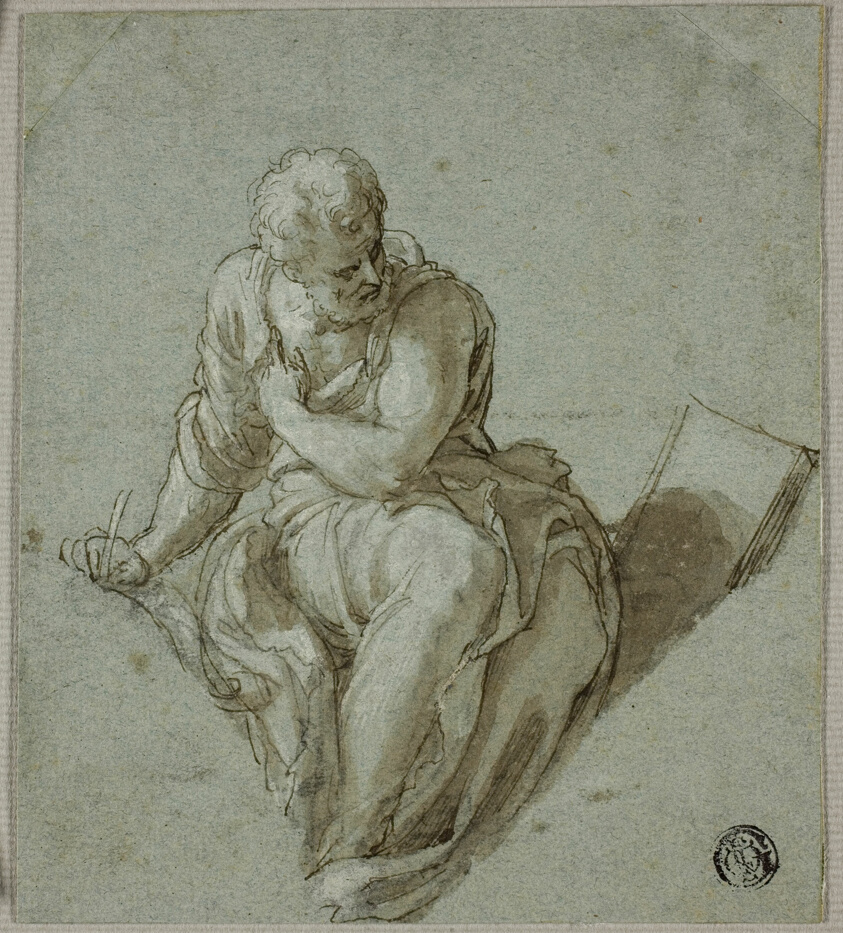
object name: Drawing and Watercolor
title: Seated Prophet or Evangelist Writing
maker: Giuseppe Porta, called Giuseppe Salviati (Italian, c. 1520-1575)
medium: Pen and brown ink and brush and brown wash, with traces of black chalk, heightened with white gouache, on blue laid paper, laid down on cream laid card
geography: Italy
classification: ink with wash; drawings (visual works); prints and drawing